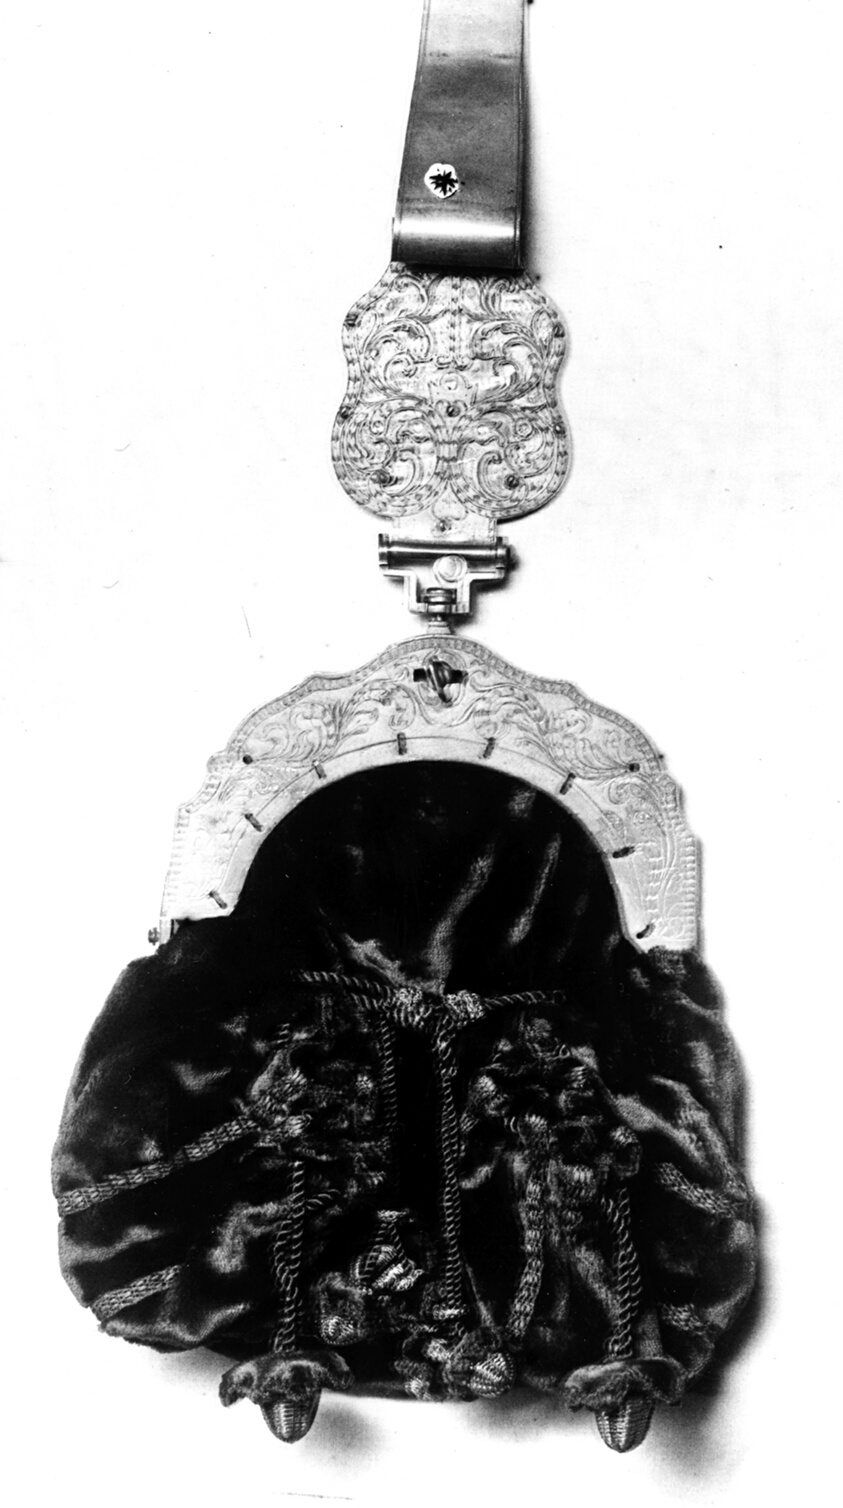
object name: Costume and Accessories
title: Bag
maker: Russia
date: 1785 (1875/1900 reworked)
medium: Silk, cut velvet weave; tassels: silk and gilt-metal cording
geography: Russia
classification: textile; bag - weaving; costume; dress (garment); clothing